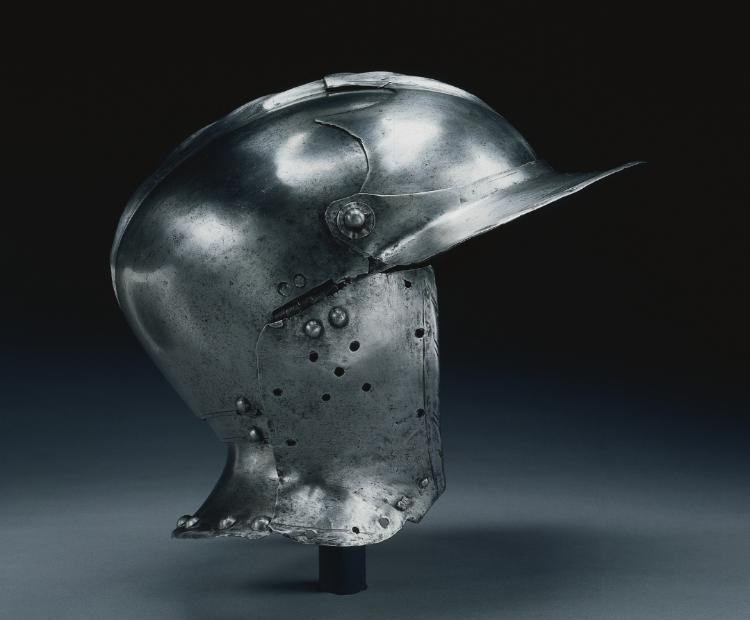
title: Burgonet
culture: Italy, 16th century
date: c. 1540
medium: steel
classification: Arms and Armor